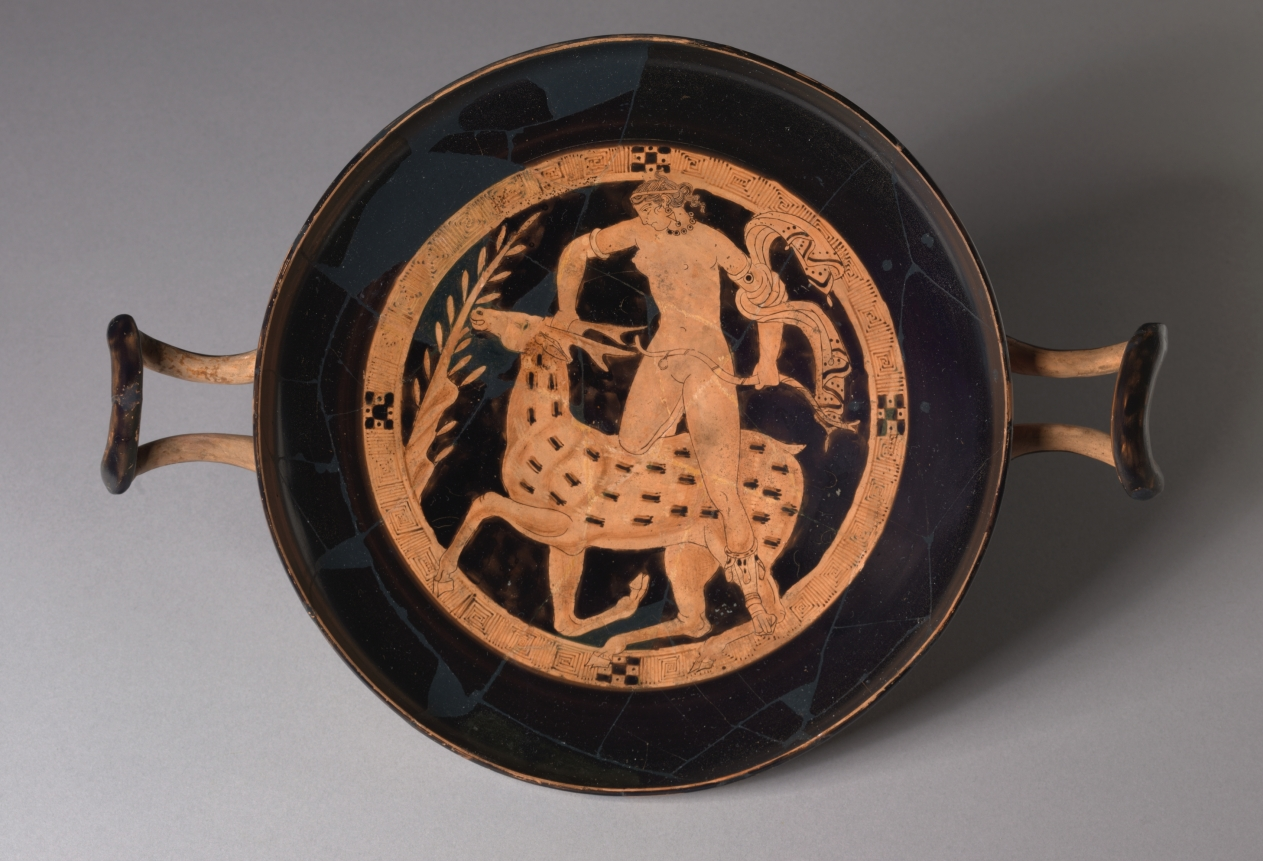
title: Red-Figure Kylix (Drinking Cup): Artemis and Stag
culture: Etruscan or Faliscan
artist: attributed to Clusium Group (Etruscan or Faliscan)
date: c. 350 BCE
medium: ceramic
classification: Ceramic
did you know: The interior of this cup contains a scene of Artemis subduing a spotted deer.